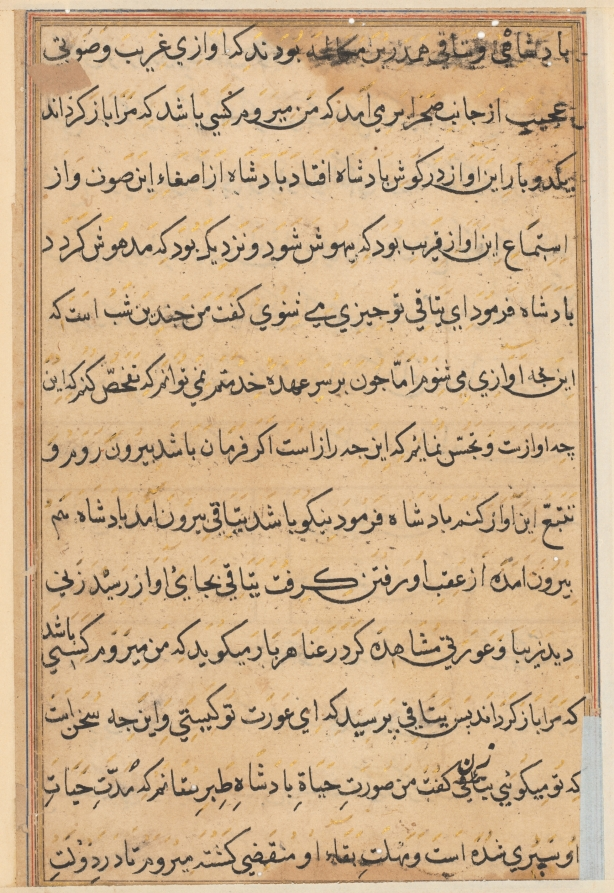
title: Page from Tales of a Parrot (Tuti-nama): text page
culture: Mughal India, court of Akbar (reigned 1556–1605)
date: c. 1560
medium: gum tempera, ink, and gold on paper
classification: Painting